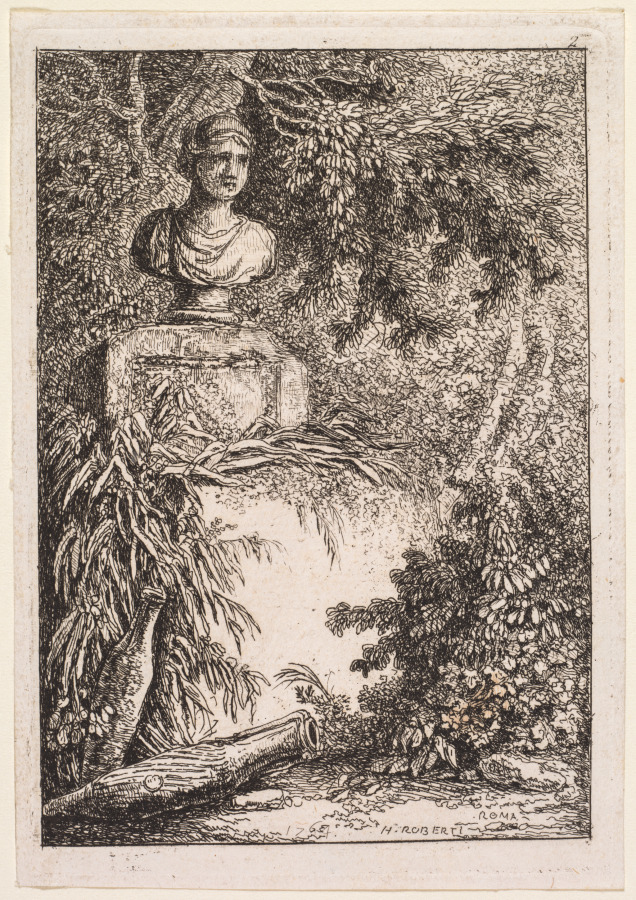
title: Les Soirées de Rome: Le Buste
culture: France, 18th century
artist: Hubert Robert (French, 1733–1808)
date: 1764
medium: etching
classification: Print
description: Derived from his own pen-and-ink drawings, this suite of etchings features fictional characters situated near recognizable buildings and statues in Rome. On the title page, Robert dedicated the suite to Marguerite Le Compte, who visited Rome in 1764 in the company of the wealthy author and art enthusiast Claude Henri Watelet. Both Le Compte and Watelet were amateur etchers, and they socialized with a group that included artists and printmakers centered at the academies in Italy. Robert’s dedication was likely motivated by the hope of future patronage from Le Compte. She may be the generous woman with a hand muff depicted in The Ancient Temple, the fifth scene in this series.